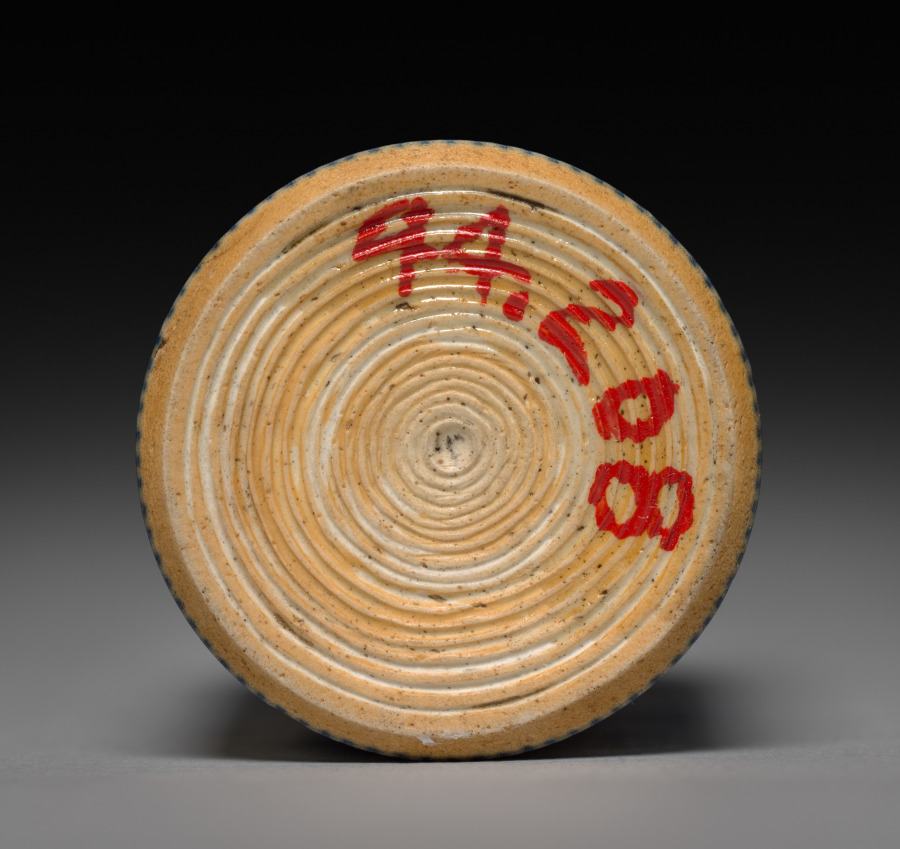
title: Snuff Bottle with Stopper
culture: China, Jiangxi province, Jingdezhen kilns, Qing dynasty (1644-1911), Yongzheng mark and reign (1723-35)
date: 1723–35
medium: porcelain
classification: Ceramic